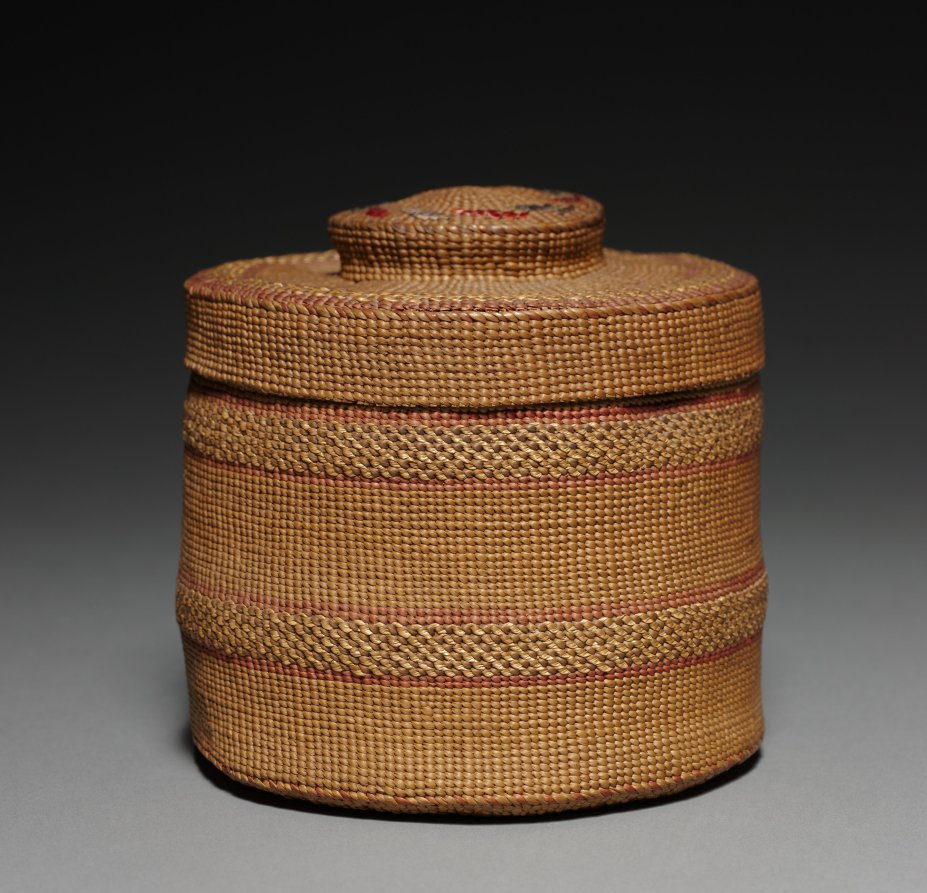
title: Covered Basket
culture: Northwest Coast, Haida, Unassigned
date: Unassigned, before 1917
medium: twilled, imbricated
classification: Basketry